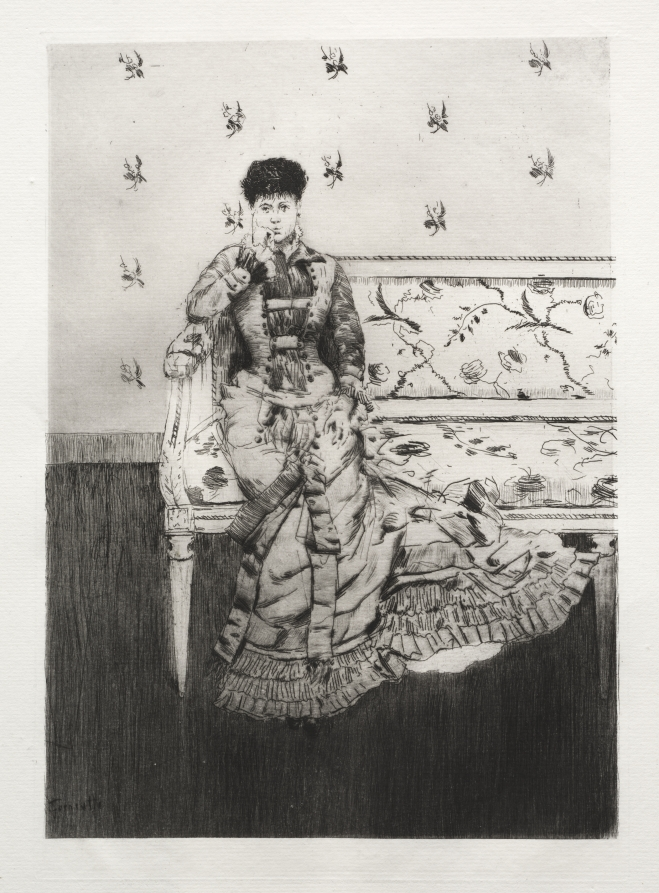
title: Fancy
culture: France, 19th century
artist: Norbert Goeneutte (French, 1854–1894)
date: 1877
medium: etching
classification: Print